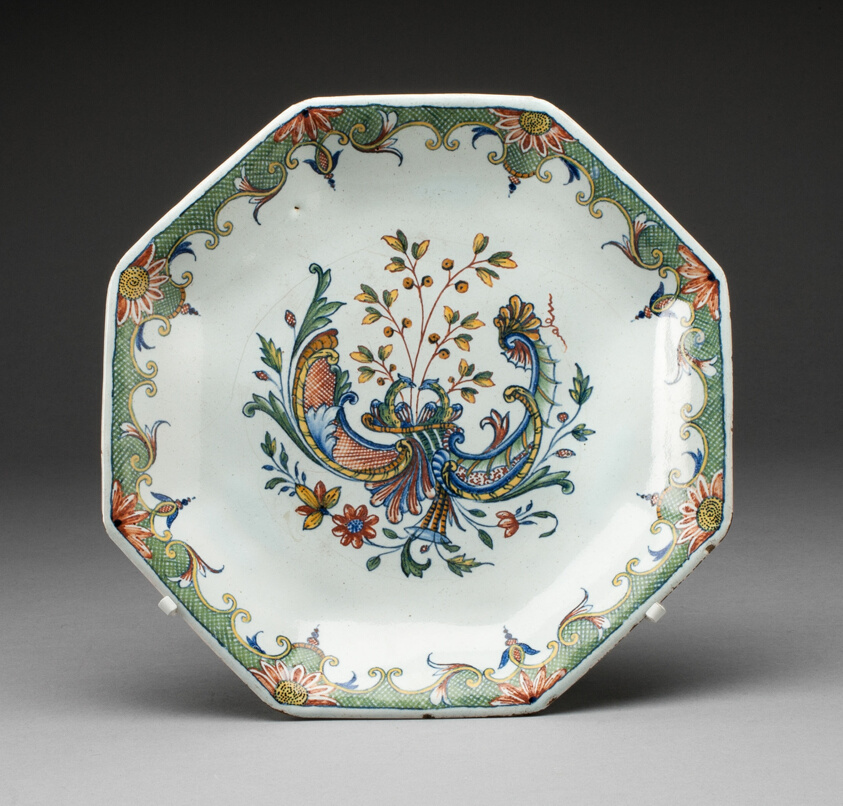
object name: Ceramics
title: Plate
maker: France, Rouen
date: c. 1750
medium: Tin-glazed earthenware (faience)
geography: Rouen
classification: plate (general, dish); dish (vessel); tin-glazed ware; earthenware; european decorative arts; ceramics